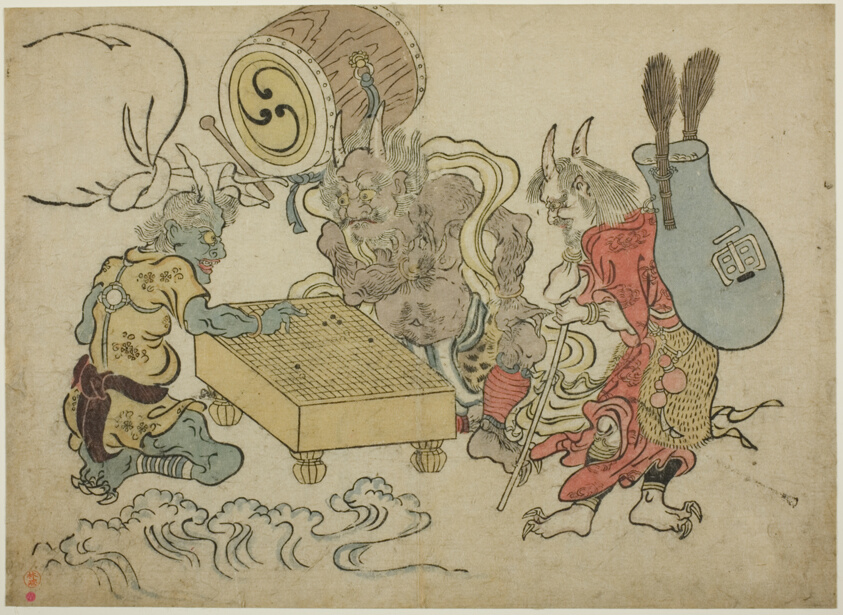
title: Wind and Thunder God Playing Go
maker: Unknown artist (Japanese)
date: 18th century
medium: Color woodblock print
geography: Japan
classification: woodblock print; print; asian art